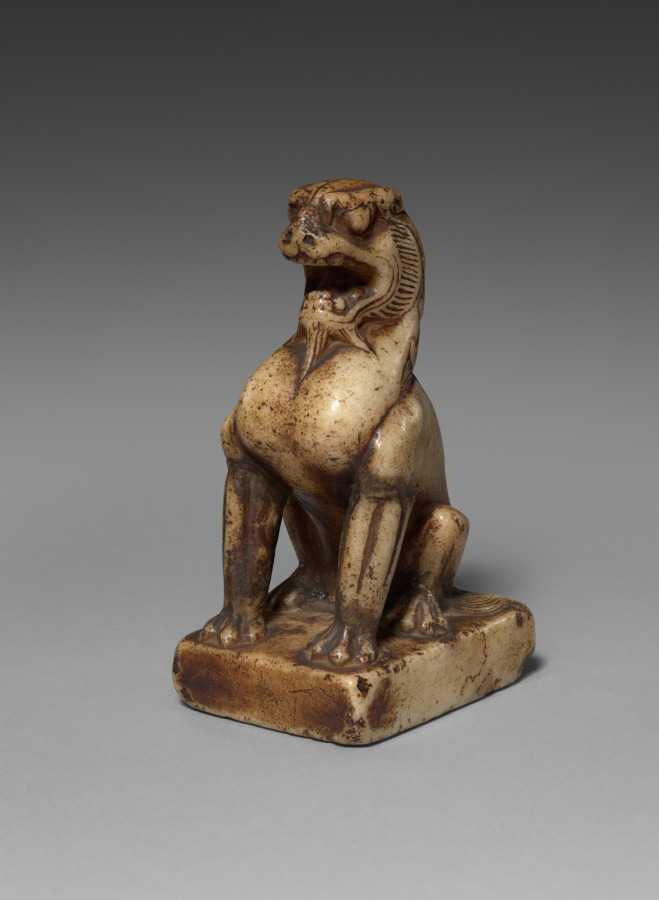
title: Lion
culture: China, Tang dynasty (618-907)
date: 618–907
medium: marble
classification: Sculpture